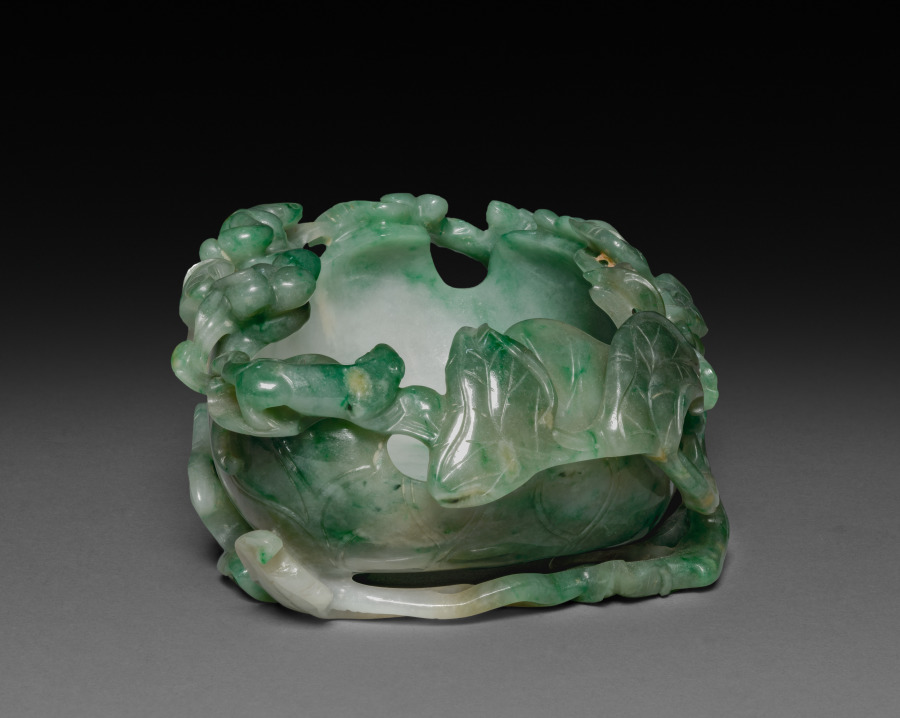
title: Brushwasher in Shape of Lotus Leaf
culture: China, Qing dynasty (1644-1911)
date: 19th Century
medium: translucent jadeite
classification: Jade